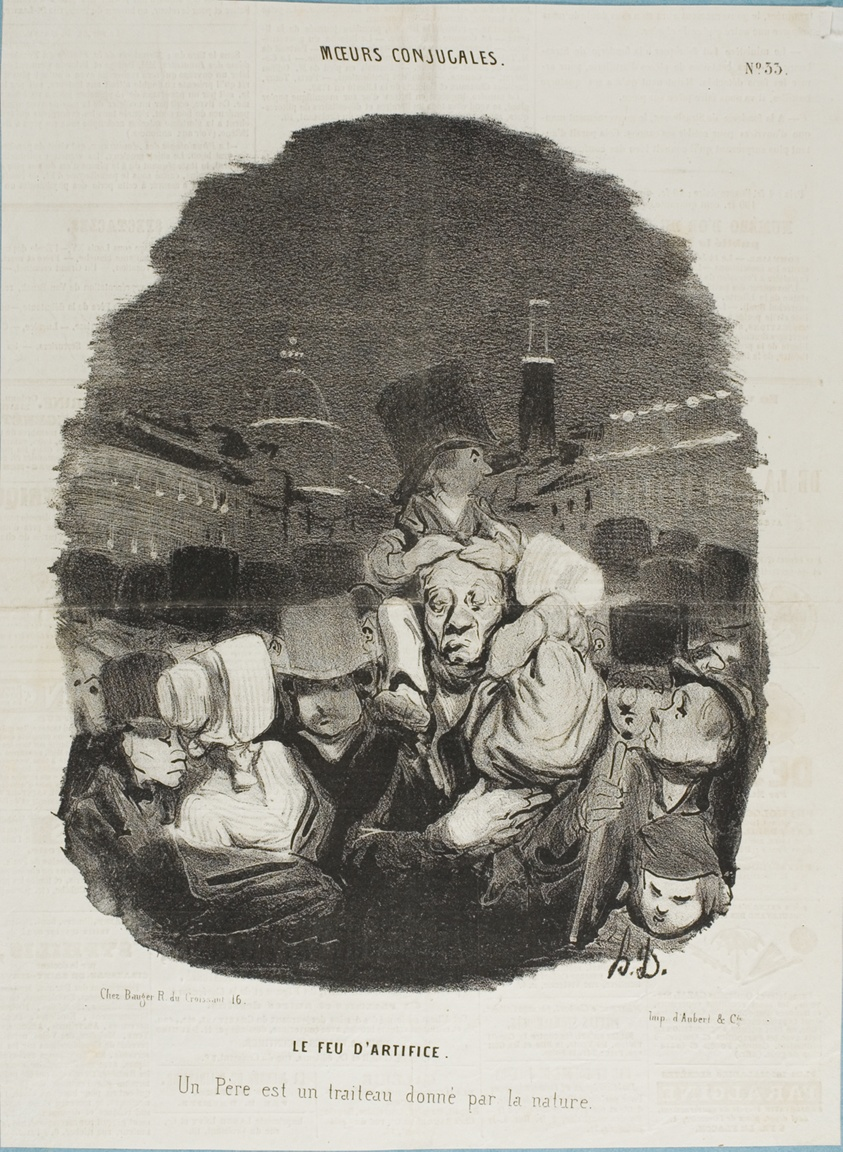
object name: Print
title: At the Fireworks Display. A father is a draft horse, provided by nature, plate 33 from Moeurs Conjugales and plate 14 in Actualités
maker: Honoré Victorin Daumier; French, 1808-1879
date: 1840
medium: Lithograph in black on ivory wove paper, with letterpress verso, mounted on blue wove paper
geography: France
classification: lithograph; print; prints and drawing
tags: fathers, children